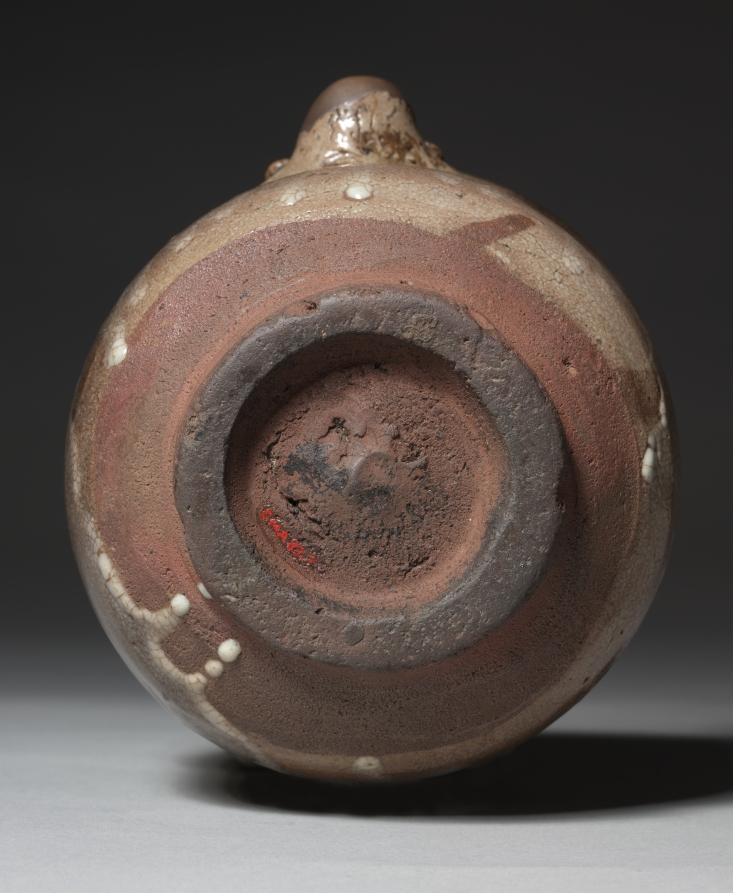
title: Spouted Bowl with Flower Design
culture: Japan, Momoyama period (1573–1615)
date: late 1500s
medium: glazed stoneware with slip decoration (Karatsu ware)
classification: Ceramic